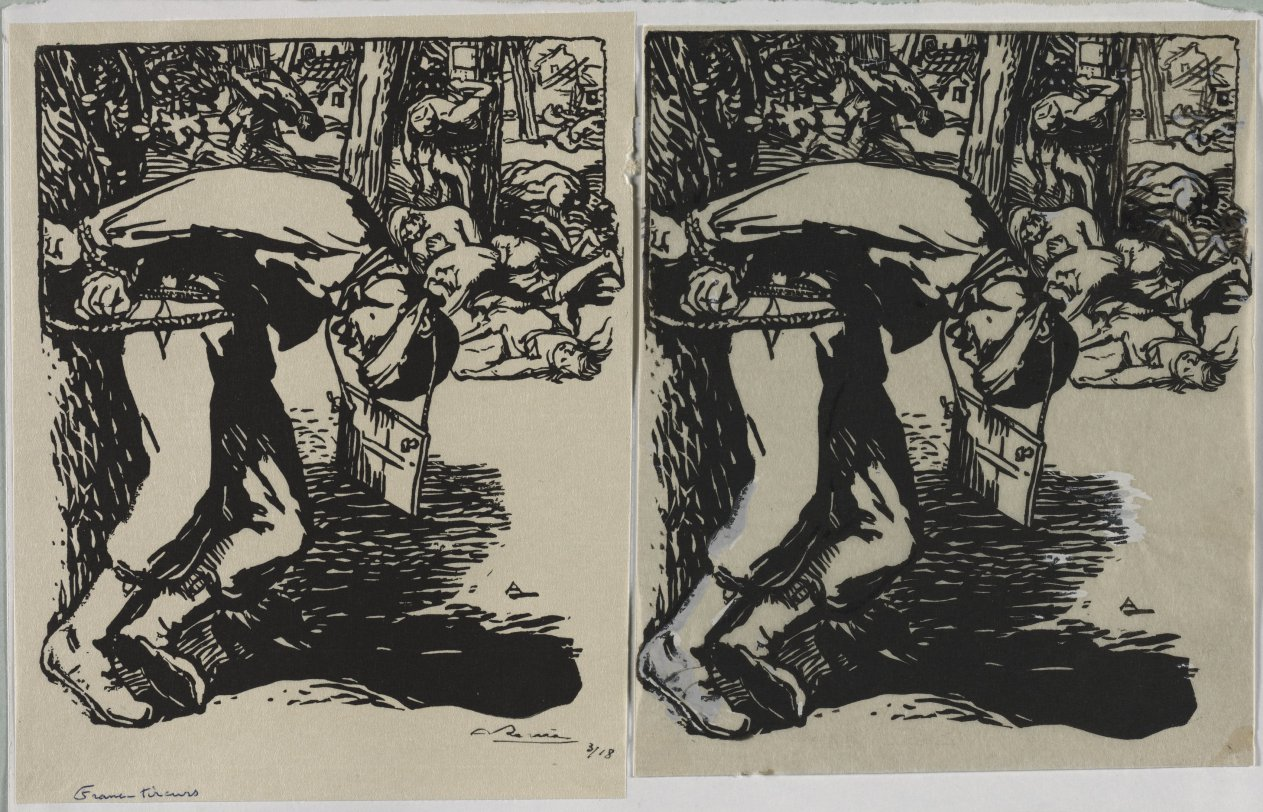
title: Franc-Tireurs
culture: France, 20th century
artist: Auguste Louis Lepère (French, 1849–1918)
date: 1914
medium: woodcut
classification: Print